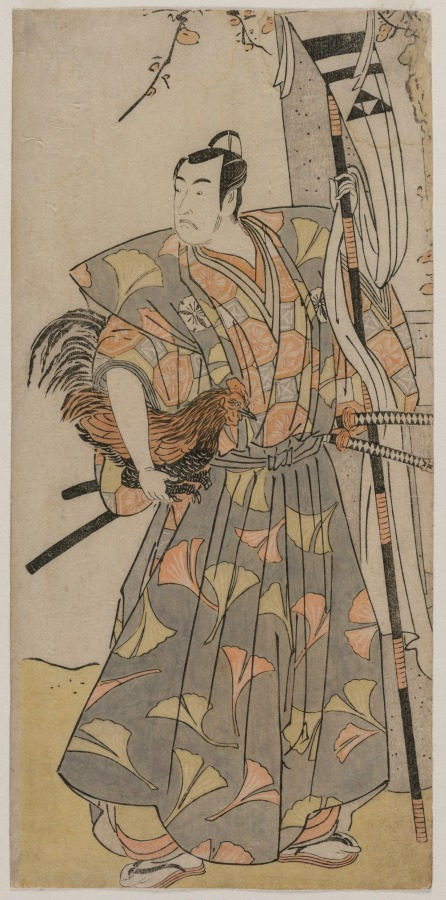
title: Actor Matsumoto Kōshirō IV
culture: Japan, Edo period (1615–1868)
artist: attributed to Katsukawa Shunkō (Japanese, 1743–1812)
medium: color woodblock print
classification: Print